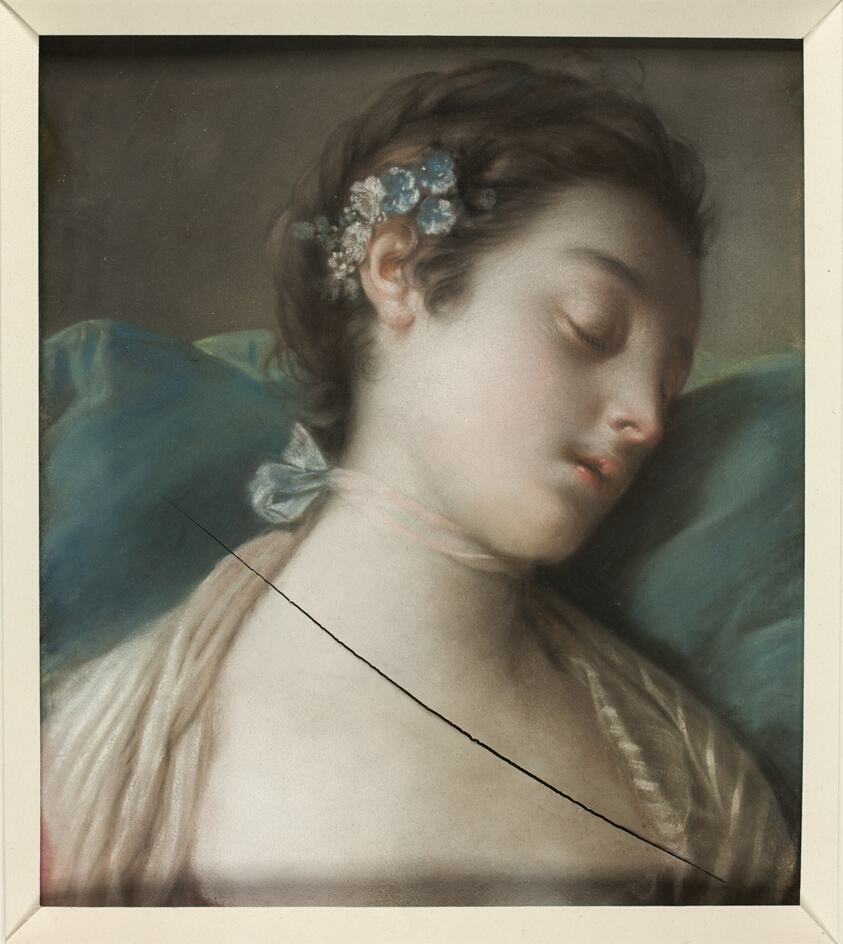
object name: Drawing and Watercolor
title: Sleeping Girl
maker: Pietro Antonio Rotari; Italian, 1707-1762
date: c. 1750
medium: Soft pastel on paper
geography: Italy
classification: pastel; drawings (visual works); prints and drawing